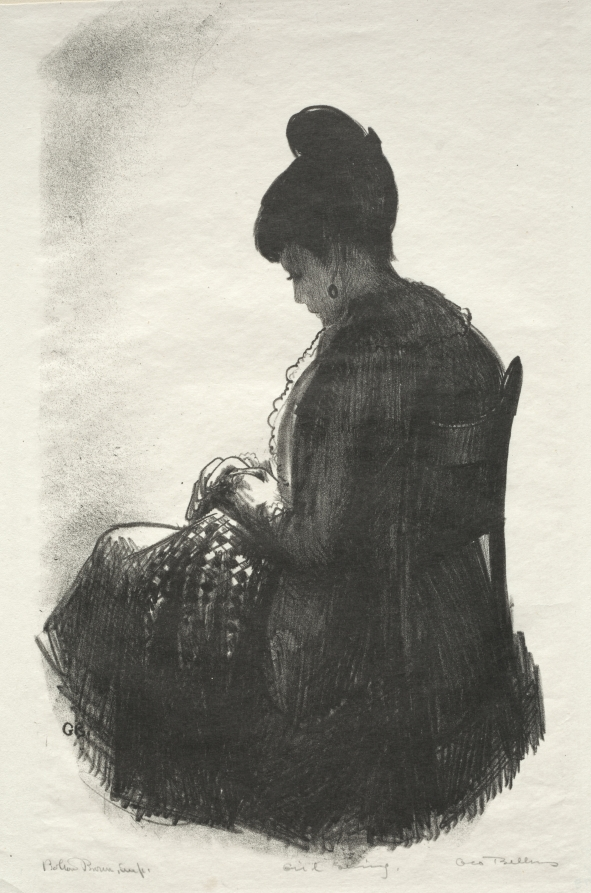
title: Girl Sewing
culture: America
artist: George Bellows (American, 1882–1925)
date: 1923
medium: lithograph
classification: Print